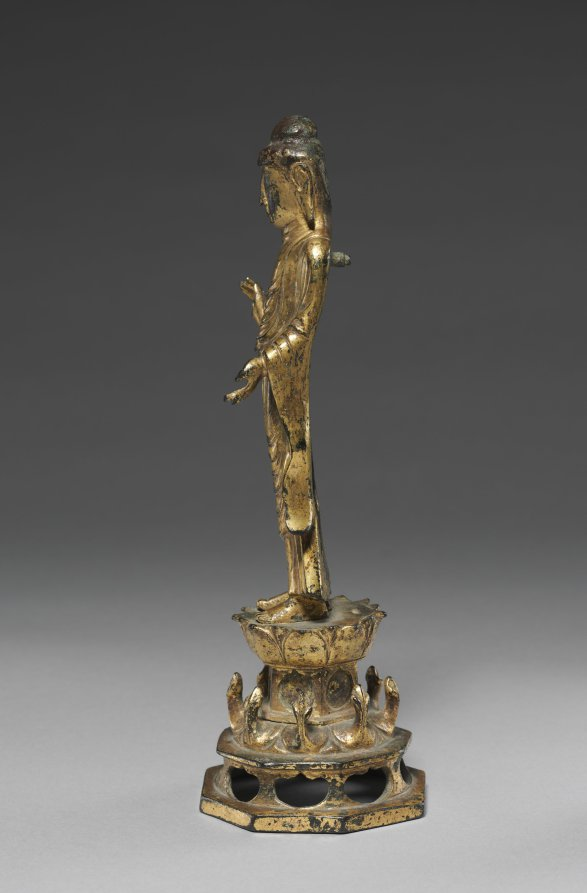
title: Statue of Amitabha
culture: Korea, Unified Silla period (676-935)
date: 800s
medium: gilt bronze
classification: Sculpture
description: This small sculpture shows Amitabha, the Buddha of the Western Paradise and the focus of the Pure Land sect of Buddhism, which was popular across East Asia, including Korea. This deity is recognizable from its right hand raised palm out in a gesture that reassures viewers to have no fear.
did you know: Small statues like this work were designed to be portable, rather than to be permanently housed in a Buddhist temple.